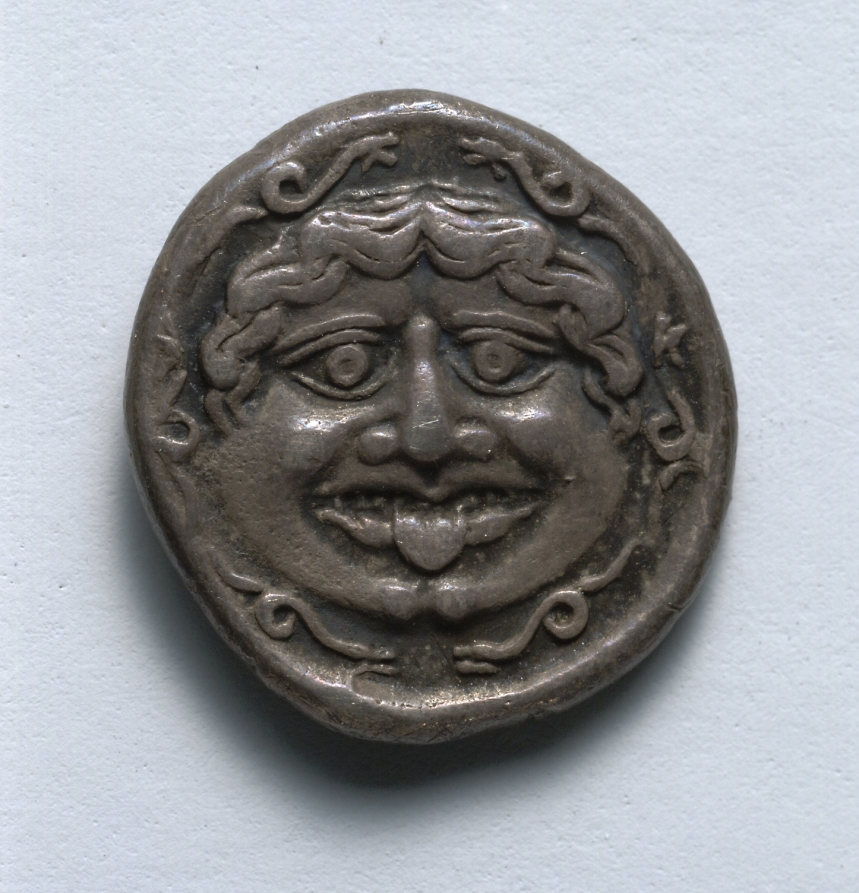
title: Hemidrachm: Gorgoneion (obverse)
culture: Greek, minted at Parion (Mysia)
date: c. 400 BCE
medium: silver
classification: Coins